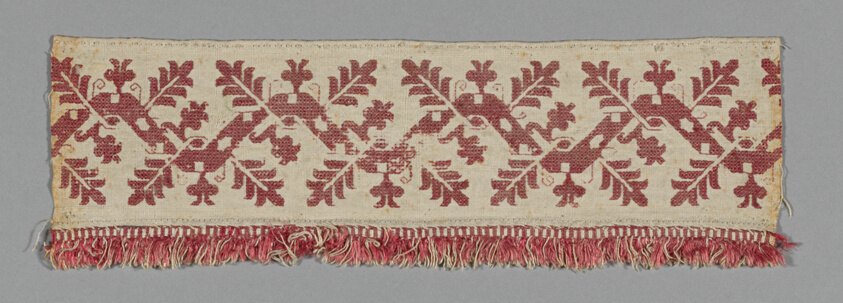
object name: Textile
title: Fragment (From a Border)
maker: Italy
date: 17th century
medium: linen and silk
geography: Italy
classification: textile; needlework (visual works)